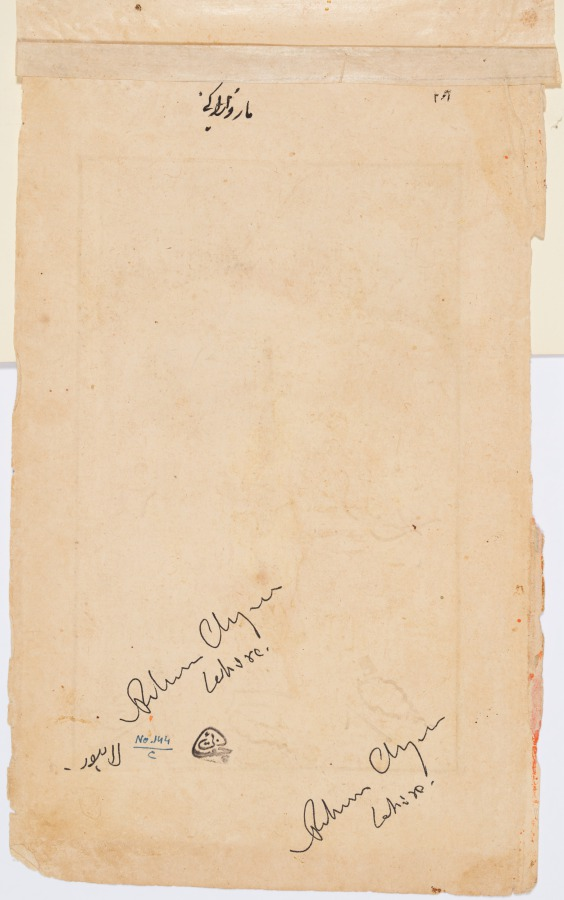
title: Maru Ragini, from a Ragamala (Garland of Melodies)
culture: Northwestern India, Rajasthan, Rajput Kingdom of Amber or Southwestern India, Deccan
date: 1650–80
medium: Gum tempera, ink, and gold on paper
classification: Painting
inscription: mārū rāginī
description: A Rajput warrior holding a spear, with piercing dagger (katar) and sword attached to his belt, stands alone with his camel in a landscape. They have arrived at the banks of a stream, verdant in contrast to the intense hot yellow of the ground behind them. The musical mode associated with this painting is based on folk melodies of Rajasthan, where local stories feature a hero with a camel mount.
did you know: The warrior’s belt is called a kamarband in Persian and is the origin of the English cummerbund.